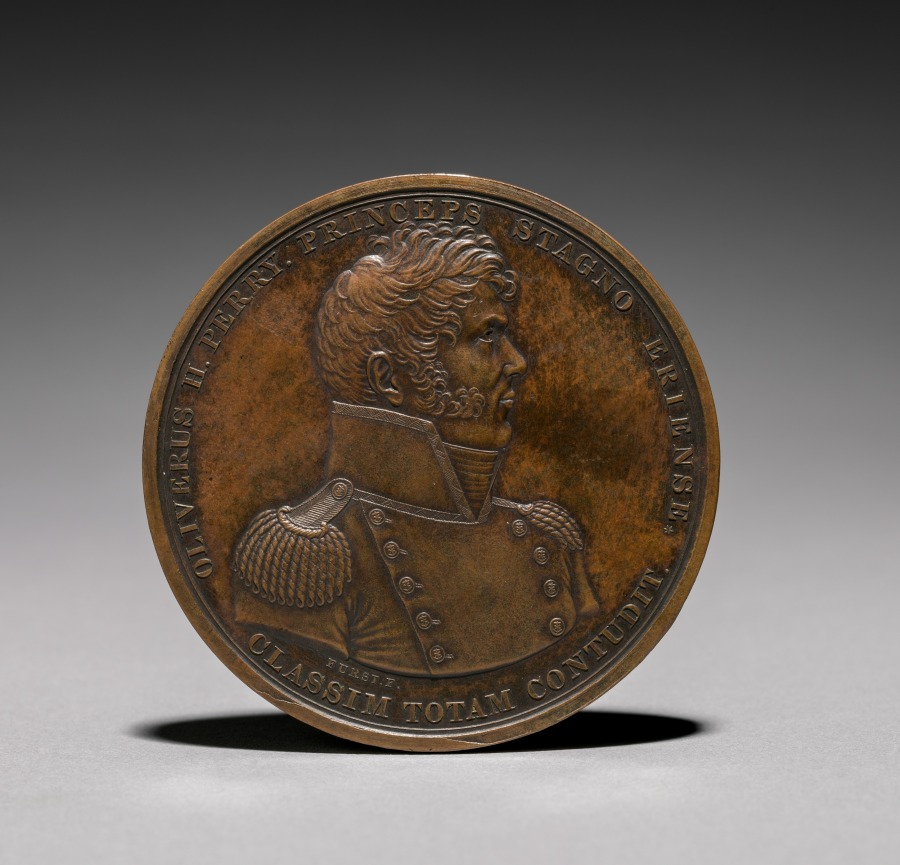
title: Medal Commemorating Commodore Oliver Hazard Perry (1785-1819) and the Battle of Lake Erie (obverse)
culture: America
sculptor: Moritz Fürst (Hungarian, 1782–1882)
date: 1813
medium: bronze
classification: Metalwork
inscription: Oliverus H. Perry, Princips Stagno Eriense. blassim Totam Contudit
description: This medal commemorating the Battle of Lake Erie on 10 September 1813 is one of a series of 27 medals commemorating American successes during the War of 1812, struck by special resolution of Congress. These medals were awarded to naval commanders in gold and to their officers in silver. The bronze examples are restrikes.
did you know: The United States naval forces, led by Commodore Oliver Hazard Perry (1785-1819), won a decisive battle over the British.